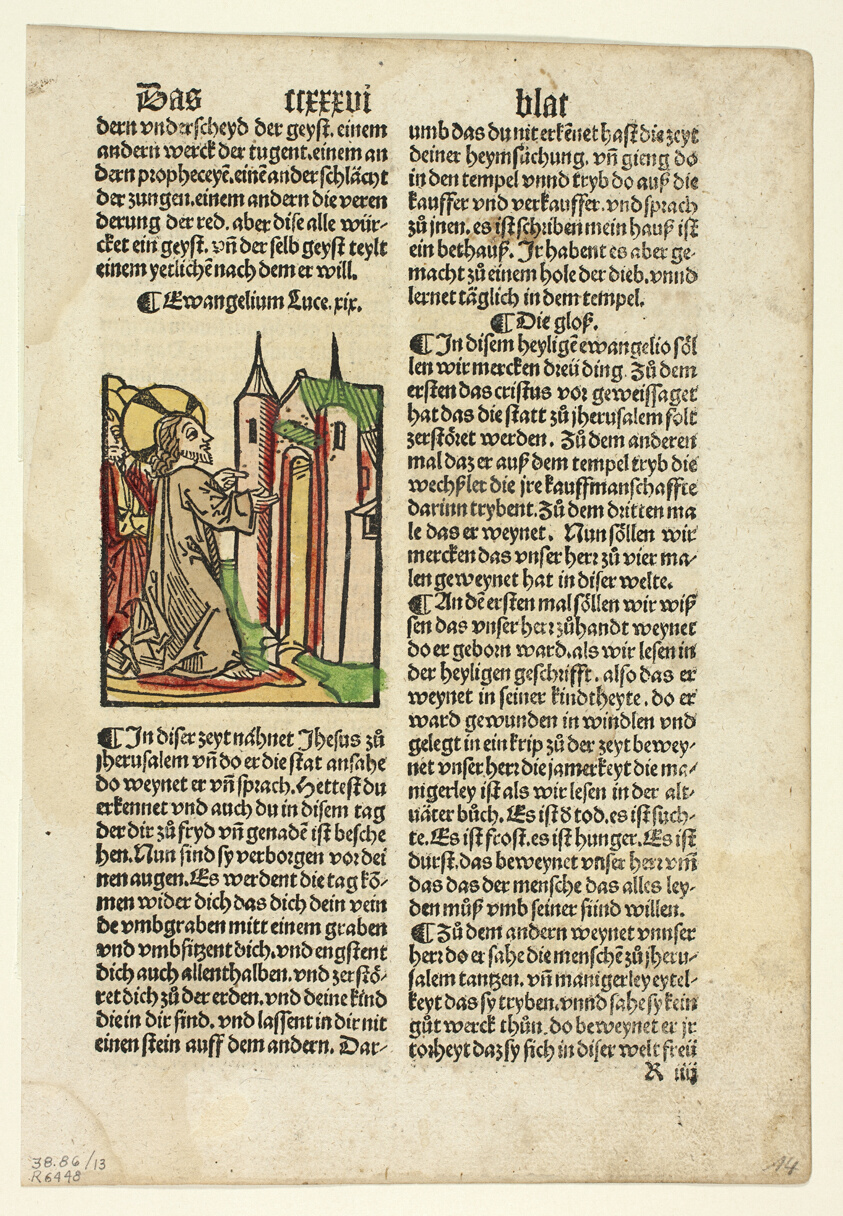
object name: Print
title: Jesus Foretelling the Destruction of Jerusalem from Spiegel menschlicher Behältnis (The Mirror of Human Salvation), Plate 13 from Woodcuts from Books of the 15th Century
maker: Unknown Artist (Augsburg, 15th century); printed and published by Johann Schönsperger the Elder (German, c. 1455–1521); portfolio text by Wilhelm Ludwig Schreiber (German, 1855–1932)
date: 1500, portfolio assembled 1929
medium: Woodcut in black with hand-colored additions, and letterpress in black (recto and verso), on buff laid paper, tipped onto cream wove paper mat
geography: Germany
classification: woodcut; print; prints and drawing